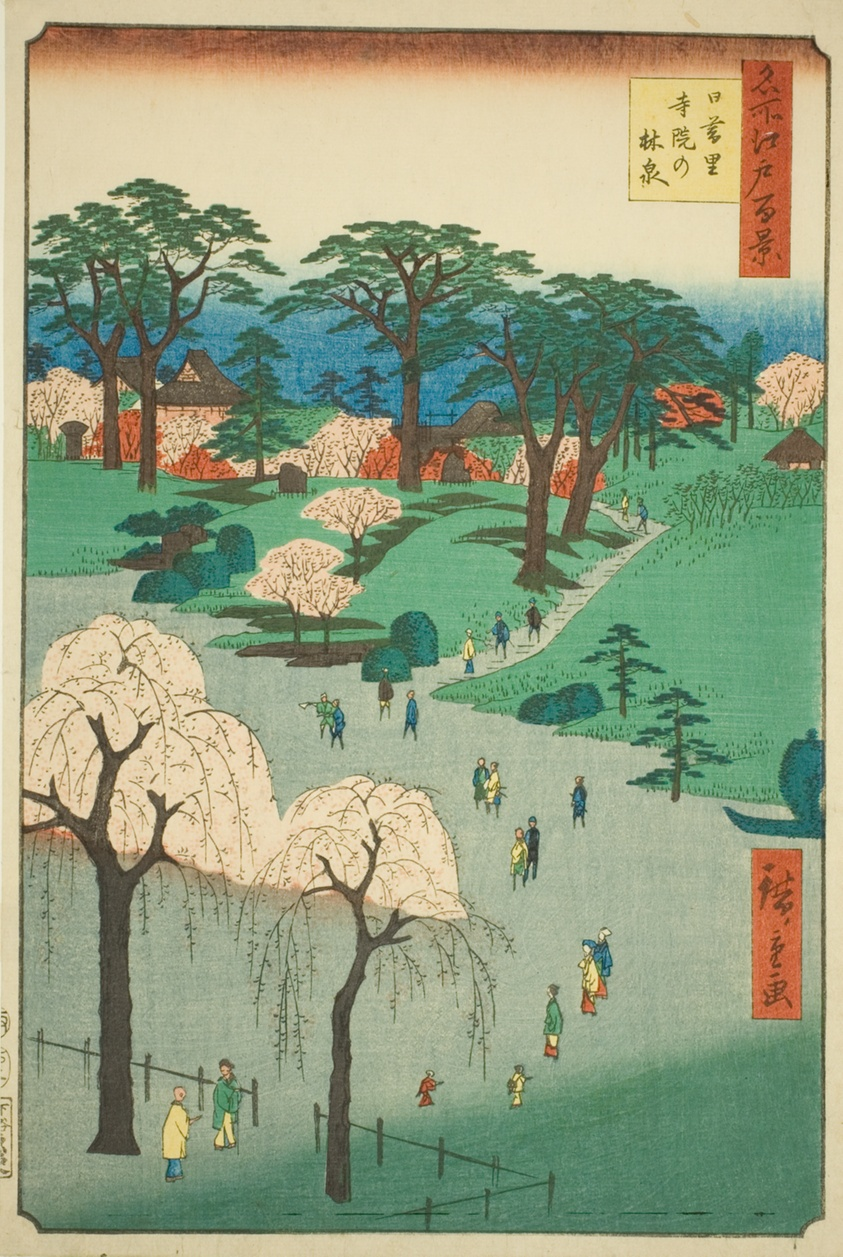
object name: Print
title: Temple Gardens in Nippori (Nippori jiin no rinsen), from the series "One Hundred Famous Views of Edo (Meisho Edo hyakkei)"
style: Japanese (culture or style)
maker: Utagawa Hiroshige 歌川 広重; Japanese, 1797-1858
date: 1857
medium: Color woodblock print; oban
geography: Japan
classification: woodblock print; print; asian art